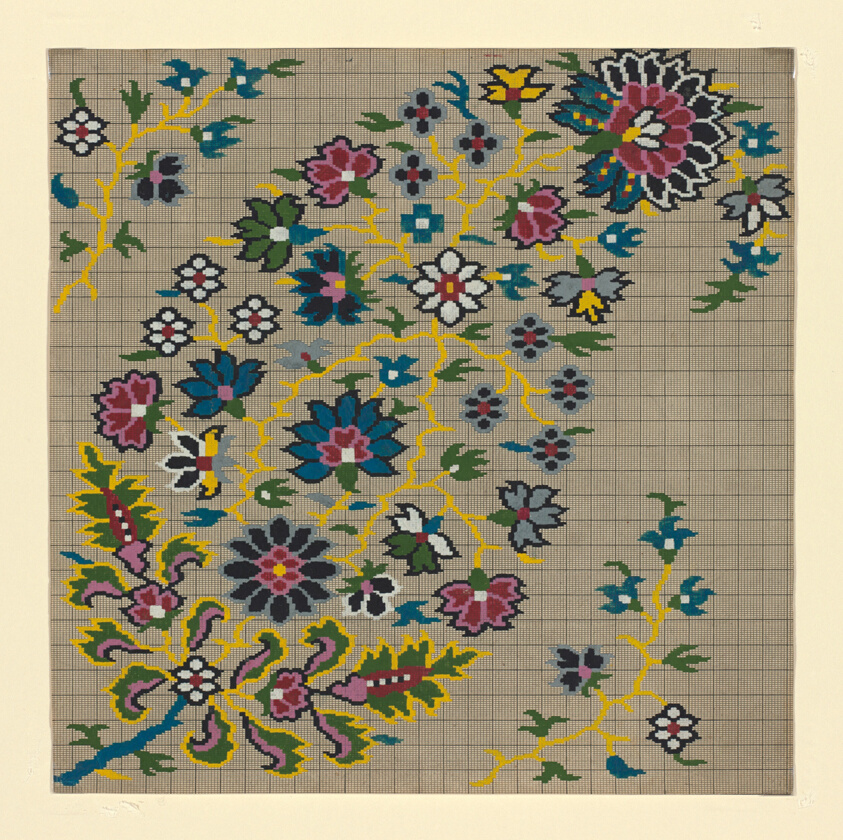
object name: Drawing and Watercolor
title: Mise-en-carte (Point-paper)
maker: France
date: 1760/90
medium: Ink and gouache on hand drawn graph paper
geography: France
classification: textile; accessory - paper design; accessories (object genre)